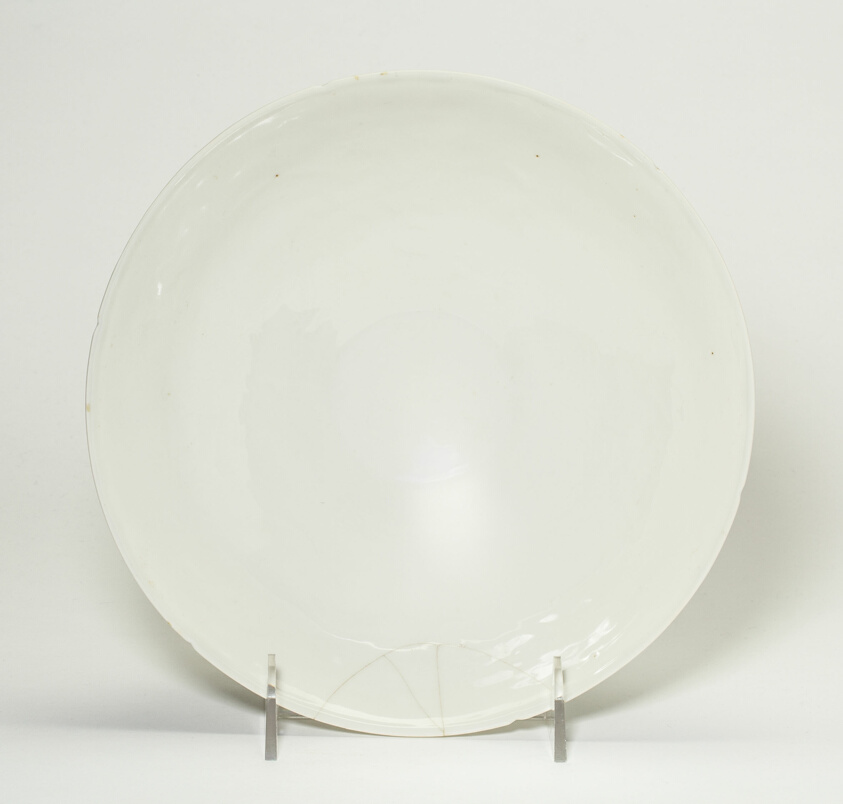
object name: Vessel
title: Bowl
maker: China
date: Ming dynasty (1368–1644), Yongle period (1403–1435)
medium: Porcelain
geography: China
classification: porcelain; ceramics; asian art; vessel